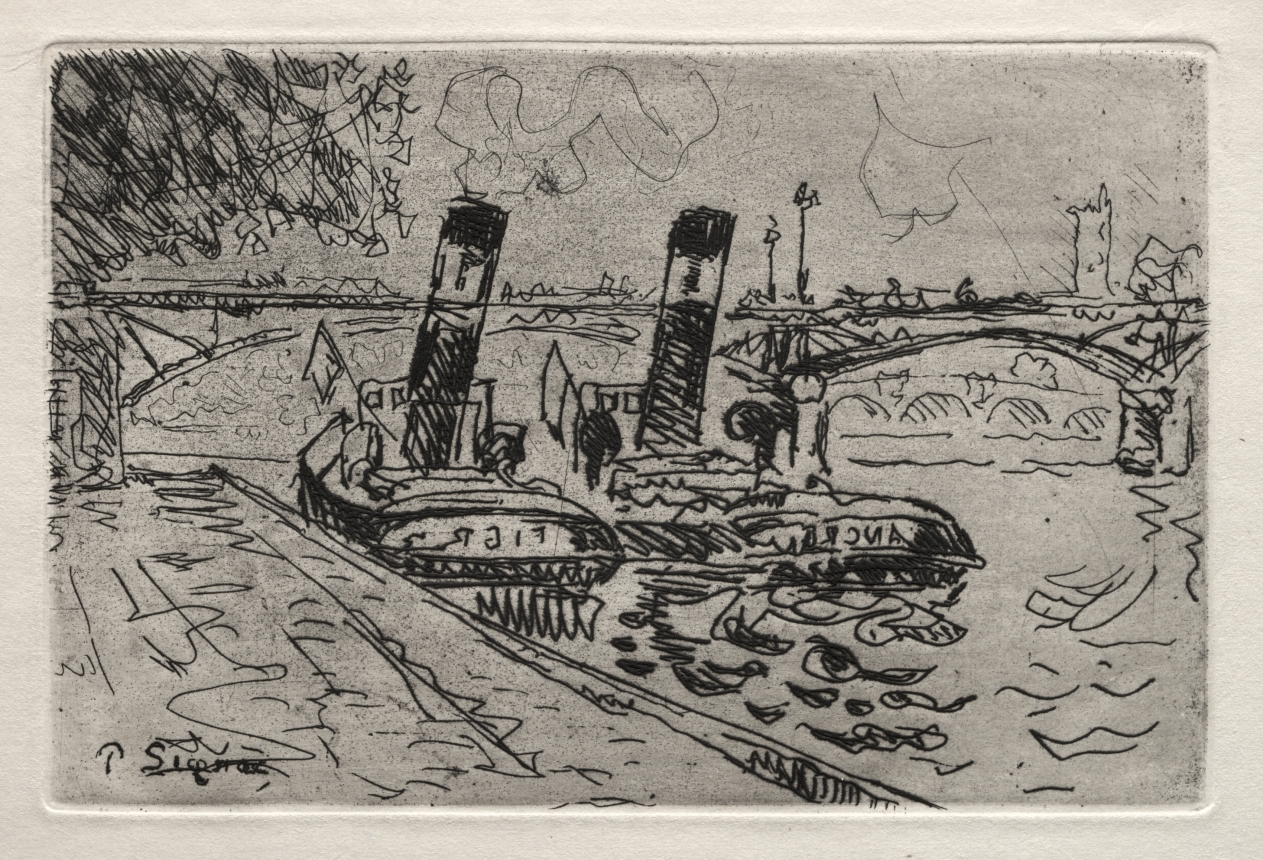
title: Paris, Le Pont des Arts avec Remorqeurs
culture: France, 20th century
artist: Paul Signac (French, 1863–1935)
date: 1927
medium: etching and aquatint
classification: Print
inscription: signed in the plate